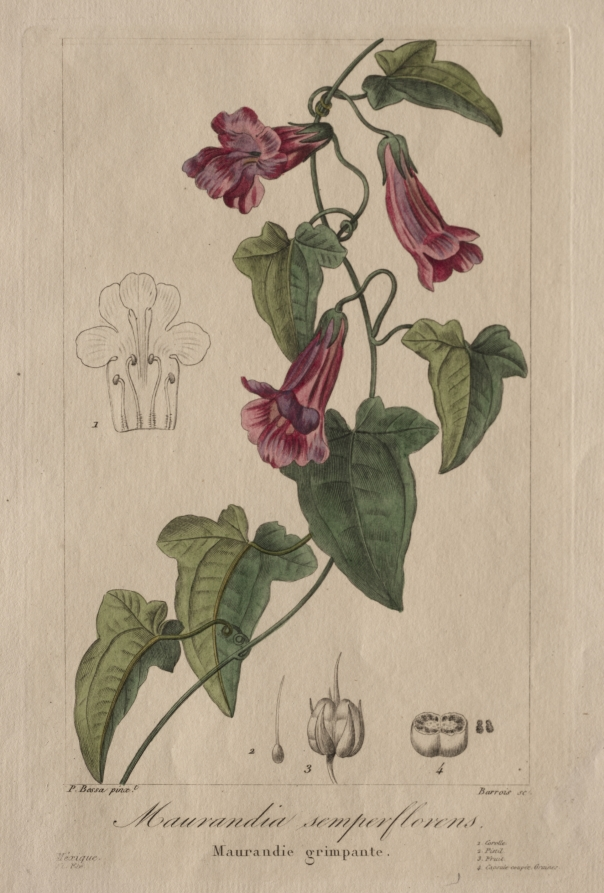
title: Flore des Jardiniers, Amateurs et Manufacturiers: Maurandia semperflorens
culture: France, 19th century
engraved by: Jean Pierre Frederic Barrois (French, 1786–after 1841)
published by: Pancrace Bessa (French, 1772–1846)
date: 1836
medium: engraving, hand-colored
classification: Print